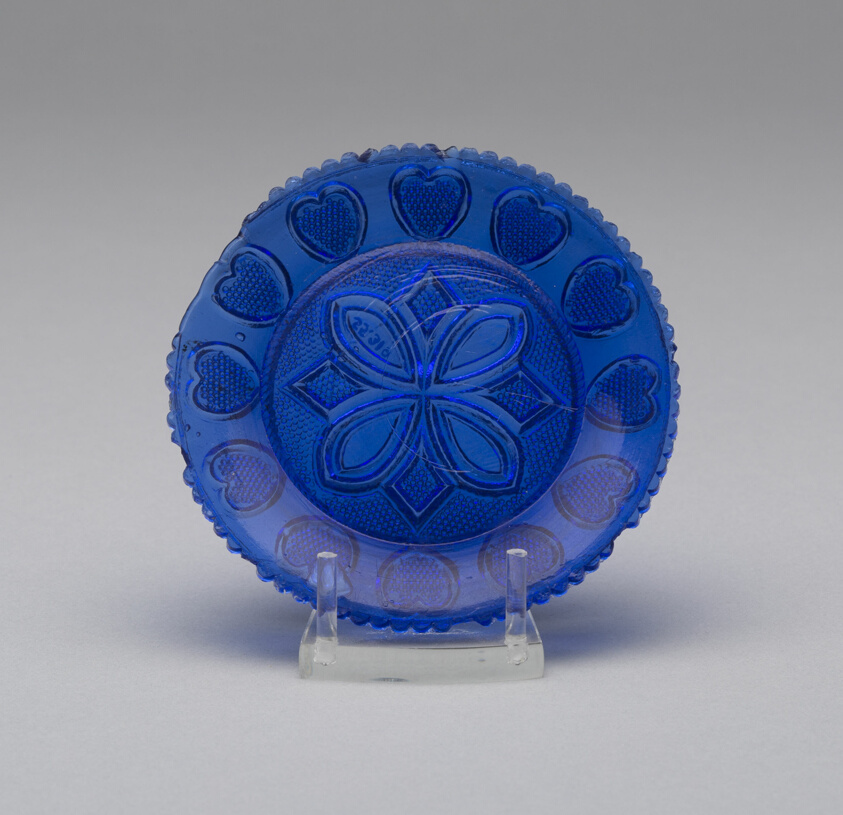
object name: Glass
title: Cup plate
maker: Artist unknown (American, 19th century); Sandwich, Massachusetts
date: 1835–40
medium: Pressed glass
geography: Sandwich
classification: plate (general, dish); glass; american decorative arts; american arts; decorative arts